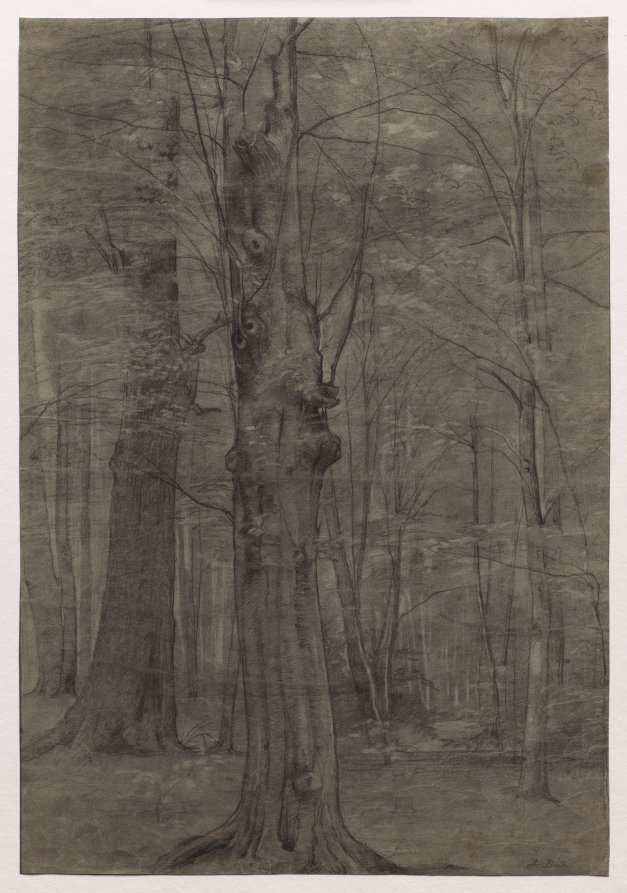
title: Trees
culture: Germany, last half 19th or first decade 20th century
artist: Leopold Bode (German, 1831–1906)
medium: black chalk, with stumping and erasing; framing lines in graphite (except at bottom)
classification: Drawing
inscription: signed, lower right, in black chalk: L. Bode ; VERSO, lower left, in graphite: No. 2446 L. Bode +MISZ